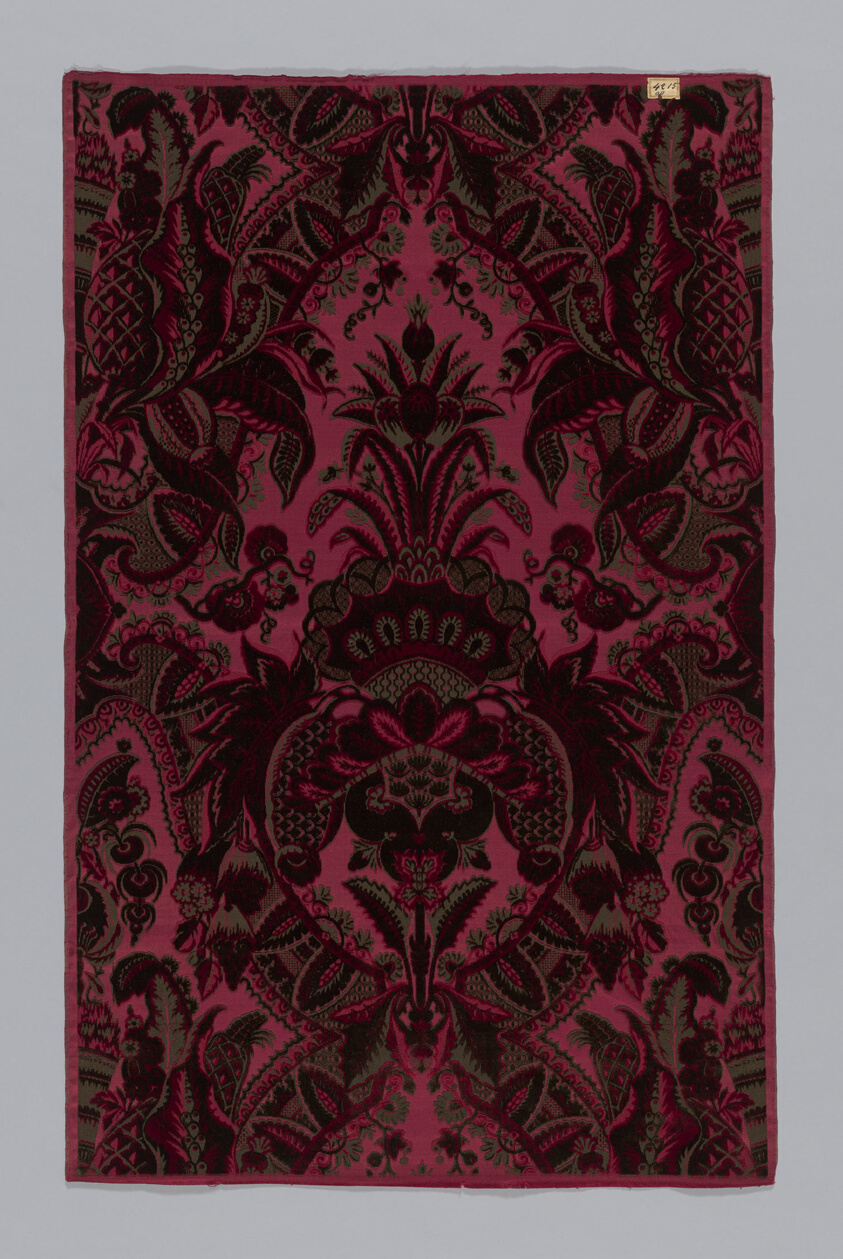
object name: Textile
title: Panel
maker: Produced by Mathevon et Bouvard, 1810–1895; France, Lyon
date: 1860/80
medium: Silk and cotton, satin weave, cut and uncut voided velvet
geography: Lyon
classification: textile; weaving - velvet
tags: fruit, lace, foliage